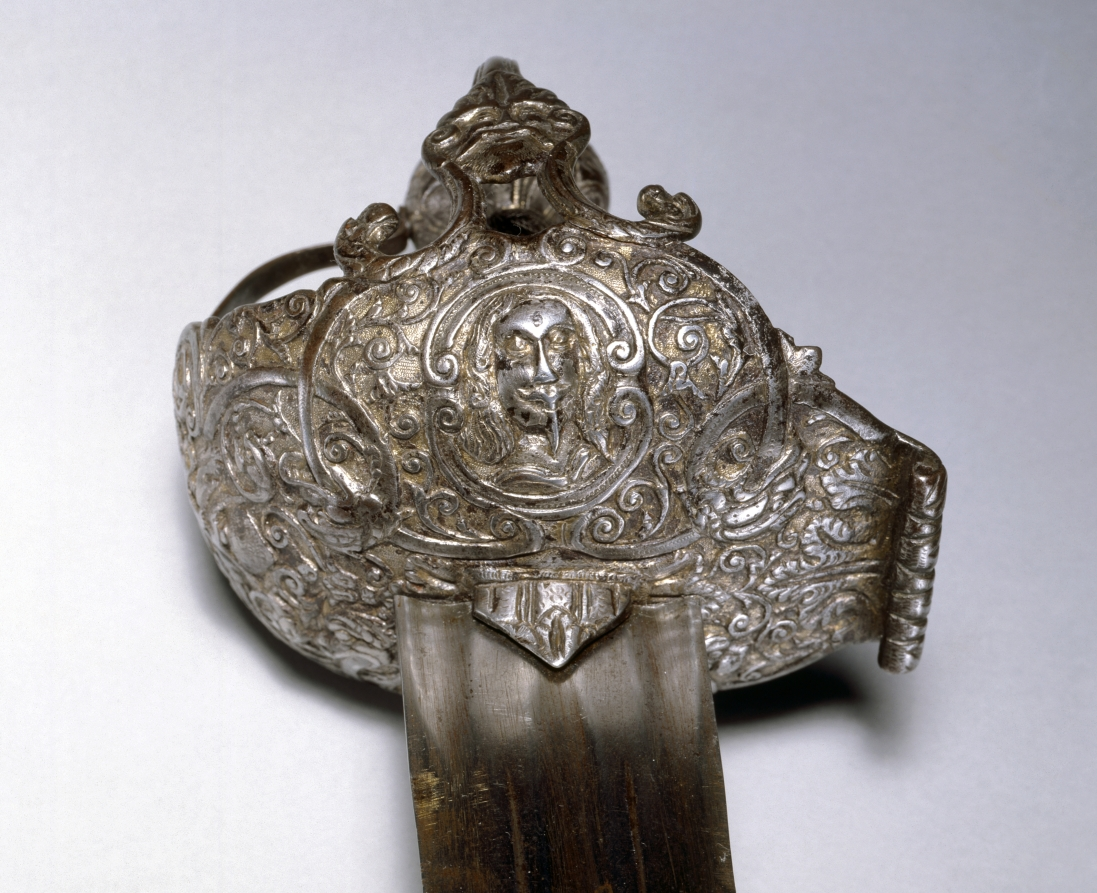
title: Basket-Hilt Broadsword ("Mortuary Sword")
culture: Hilt: England; Blade: Germany, Solingen (?), Hilt: 17th Century; Blade: 18th Century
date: hilt: c. 1640–50; blade: 1700s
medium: steel, chiseled; inlaid gilt- silver foil; wood and wire grip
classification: Arms and Armor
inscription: ANDRIA FERRARA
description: The decoration on this sword's hilt includes an image of King Charles I of England (beheaded in 1649). Because the image resembles the king's death mask, this sword is known as a "mortuary sword." It may have belonged to Sir Thomas Fairfax, a general of the Parliamentary cavalry during the English Civil War (1642-51). Large, double-edged broadswords, designed for heavy cavalry use, were common from the 1600s through the 1800s.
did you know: The ornate basket hilt which protects the hand, is chiseled with leafy decorative scrollwork and grotesque masks.